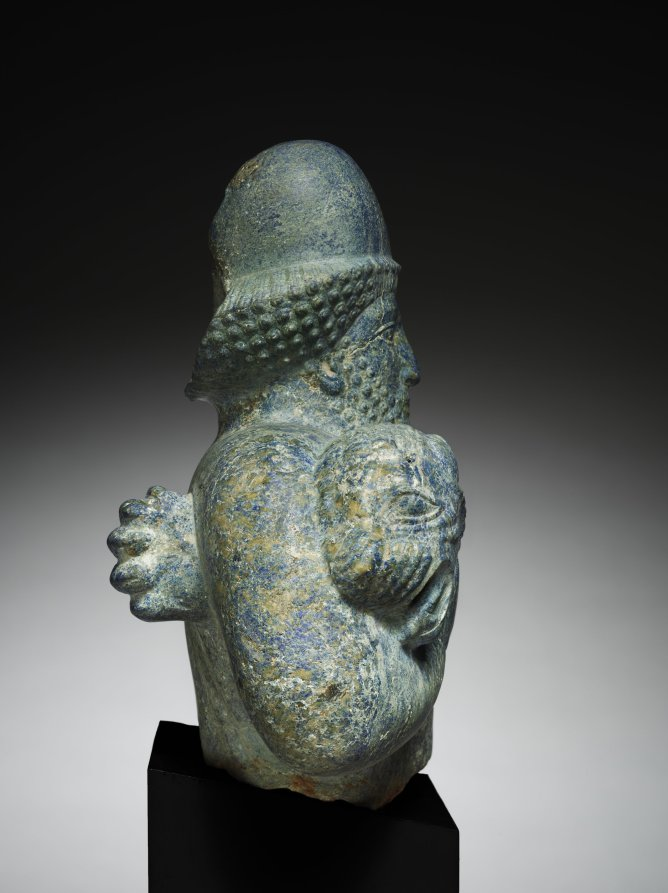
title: Median Lion Strangler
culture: Iran, Achaemenid (550–330 BCE)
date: 500–450 BCE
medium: lapis lazuli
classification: Sculpture